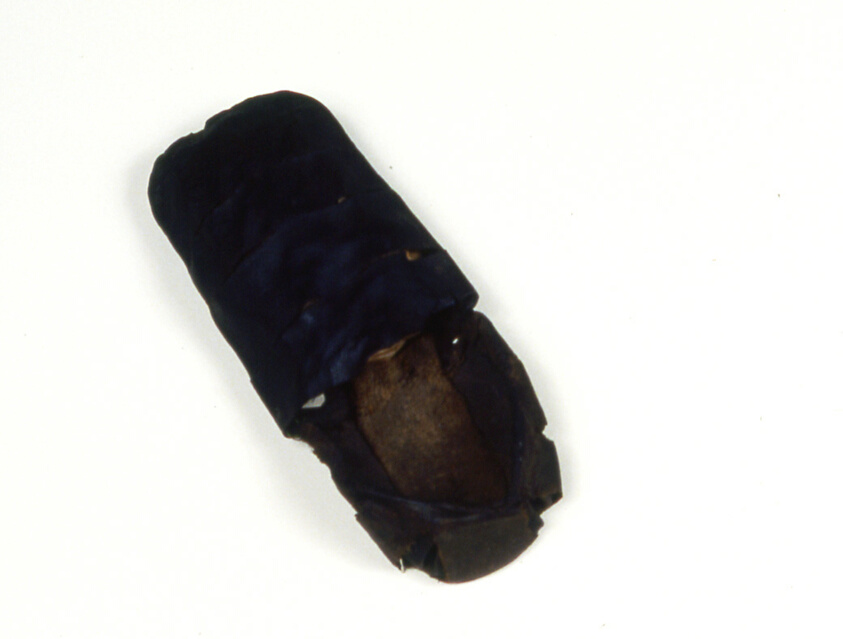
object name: Textile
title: Shoe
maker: England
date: 16th century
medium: Silk, plain weave over leather, slashed; insole of wool, plain weave; stitched with waxed linen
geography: England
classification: textile; shoes - misc; costume accessory - shoe